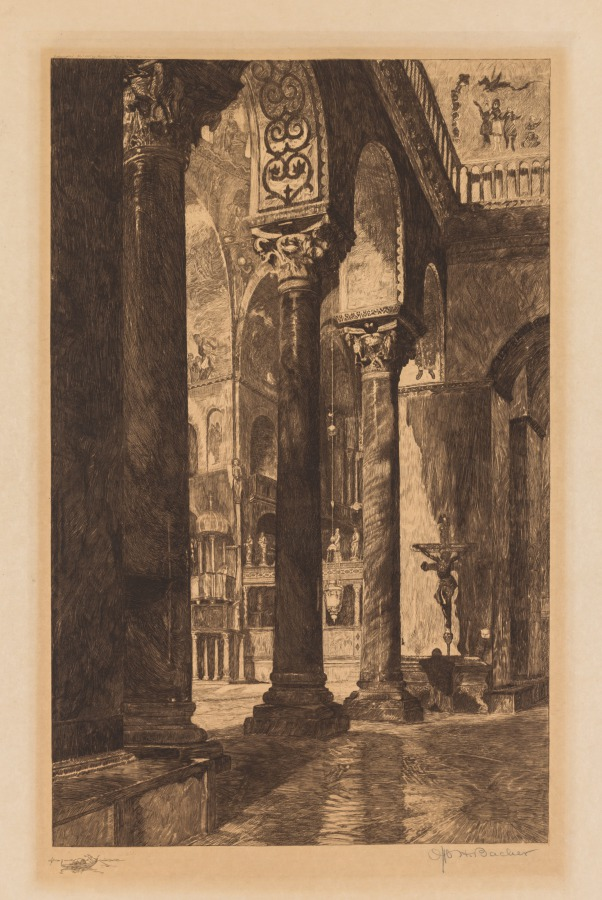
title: Interior of St. Mark's, Venice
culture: America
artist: Otto H. Bacher (American, 1856–1909)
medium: etching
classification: Print